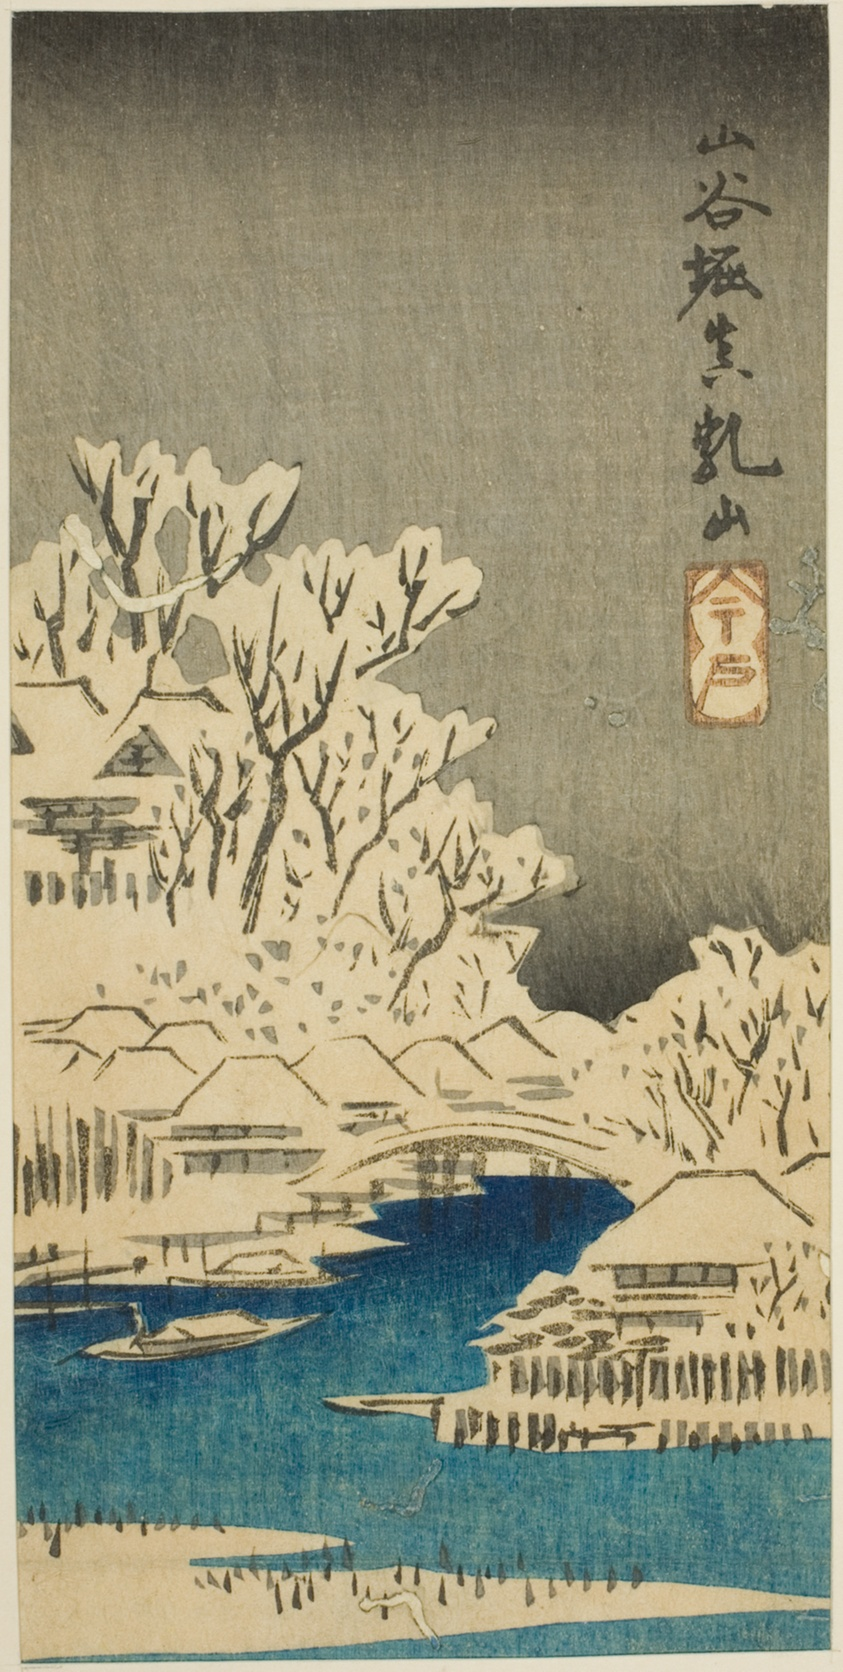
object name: Print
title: Sanya Canal and Matsuchi Hill (Sanyabori Matsuchiyama), section of a sheet from the series "Cutouts of Famous Places in Edo (Harimaze Koto meisho)"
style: Japanese (culture or style)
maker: Utagawa Hiroshige 歌川 広重; Japanese, 1797-1858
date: 1852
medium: Color woodblock print; section of harimaze sheet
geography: Japan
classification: woodblock print; print; asian art